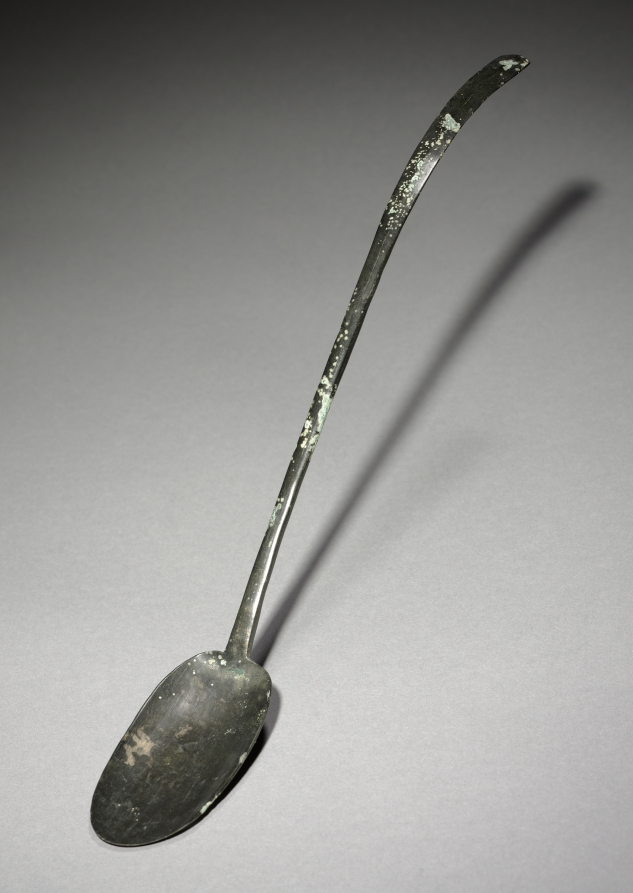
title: Spoon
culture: Korea, Goryeo dynasty (918–1392)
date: 918–1392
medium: silver bronze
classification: Metalwork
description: Celadons, spoons, seals, and bronze mirrors were the most common burial objects in tombs during the Goryeo period (918-1392). Furnishing tombs with an elaborate assemblage of objects was believed to honor and comfort the newly dead. Generally, Goryeo tombs were left untouched until the late 19th century. During the colonial period (1910–45), however, Japanese archaeologists hastily excavated the tombs located in Kaeseong, the former capital of the Goryeo period. Scholars recently have proposed that toward the end of the 14th century, Koreans enjoyed meat-based soups more than any other dishes, explaining why many more spoons than chopsticks were buried in tombs.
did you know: Bronze spoons are the most common burial items. Scholars have proposed that toward the end of the 14th century, Koreans enjoyed meat-based soups more than any other dishes, explaining why spoons became common household items as well as burial goods.